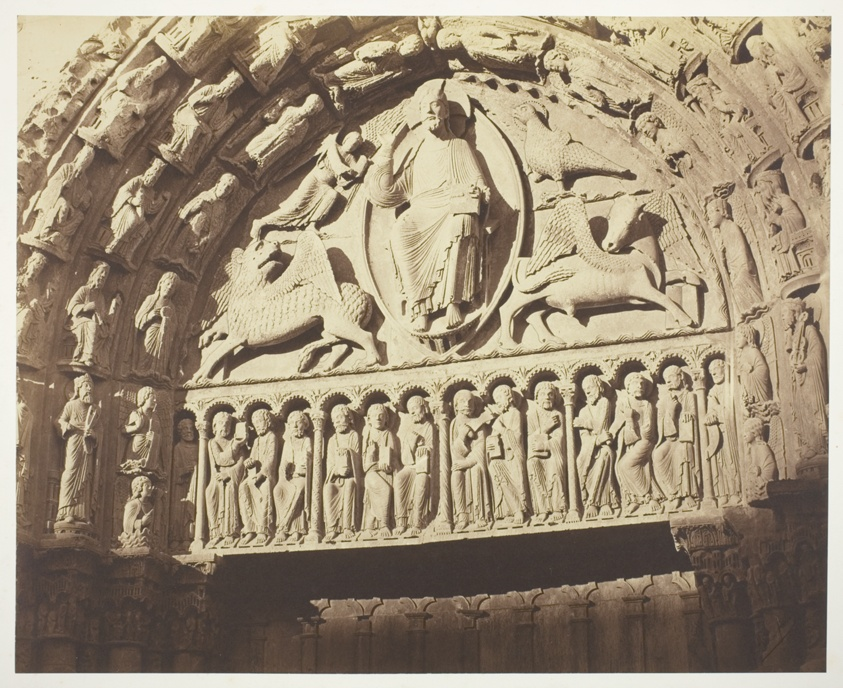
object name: Photograph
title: Chartres Cathedral West Facade; Royal Portal, Central Bay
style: 19th century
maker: Bisson Frères (Louis-Auguste Bisson, French, 1814–1876 and; Auguste-Rosalie Bisson, French, 1826–1900)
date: 1854/63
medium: Albumen print, from the album "Reproductions photographiques des plus beaux types d’architecture et de sculpture"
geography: France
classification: albumen silver print; photographic process; photography; photograph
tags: Collected by Hugh Edwards, architecture